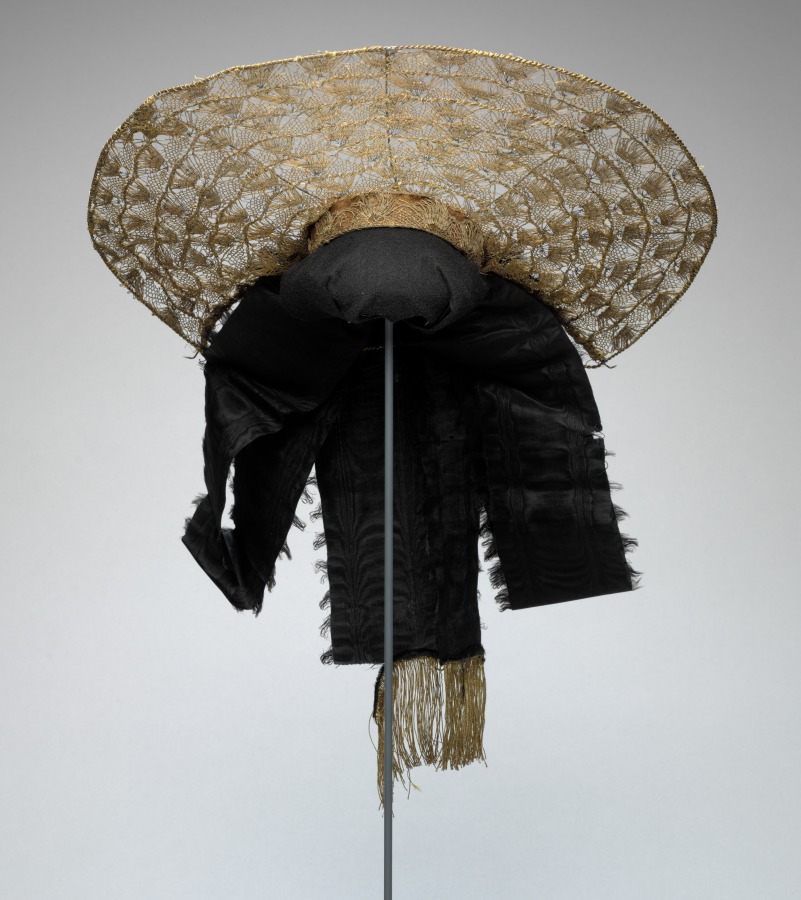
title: Bonnet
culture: Germany, Early 20th Century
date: early 1900s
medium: lace, wire, tinsel, moire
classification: Garment